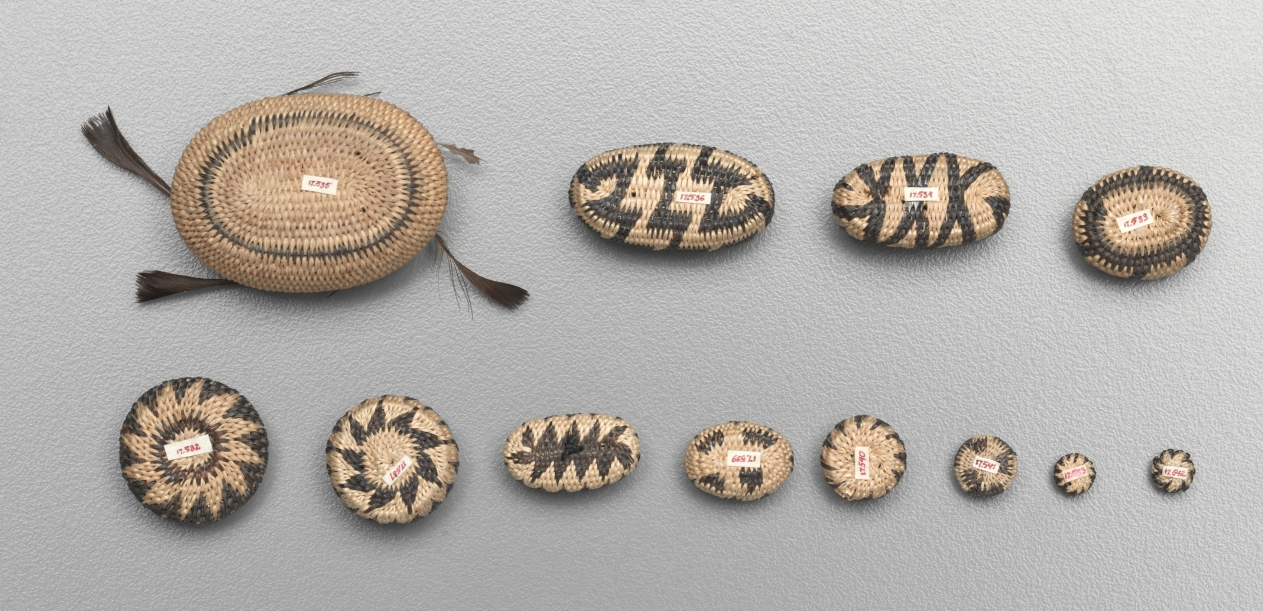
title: Miniature Round Basket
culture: California, Pomo, 20th century (?)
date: early 1900s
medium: coiled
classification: Basketry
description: Miniature baskets were made to demonstrate the basket maker’s virtuoso skill; these tiny marvels seem to be no exception—the smallest are just a few millimeters wide but still patterned. Such fine work required dexterity both in weaving and in harvesting and preparing the plant materials used to create the basket.